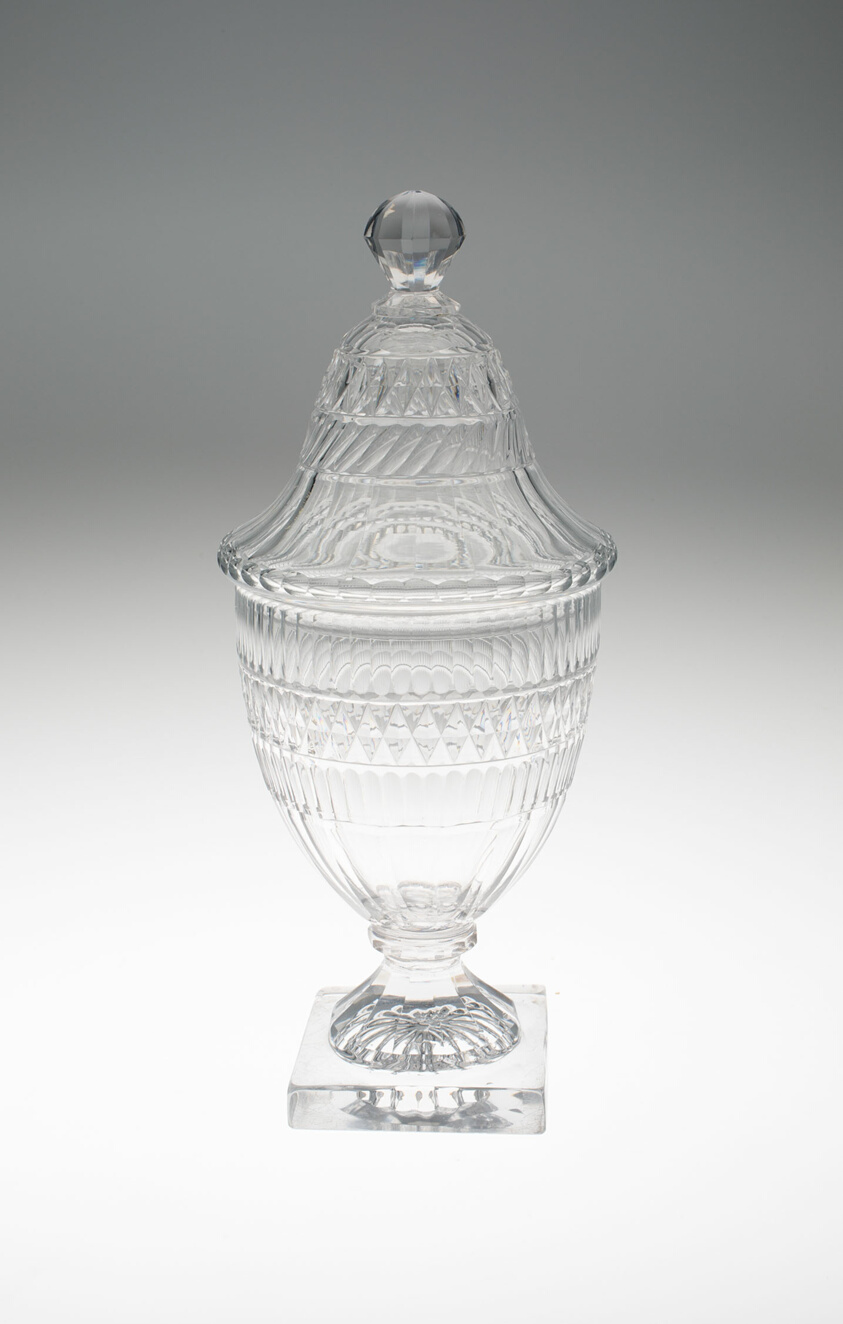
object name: Glass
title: Covered Urn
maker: England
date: 1810/30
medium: Glass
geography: England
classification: compote; dish (vessel); glass; european decorative arts